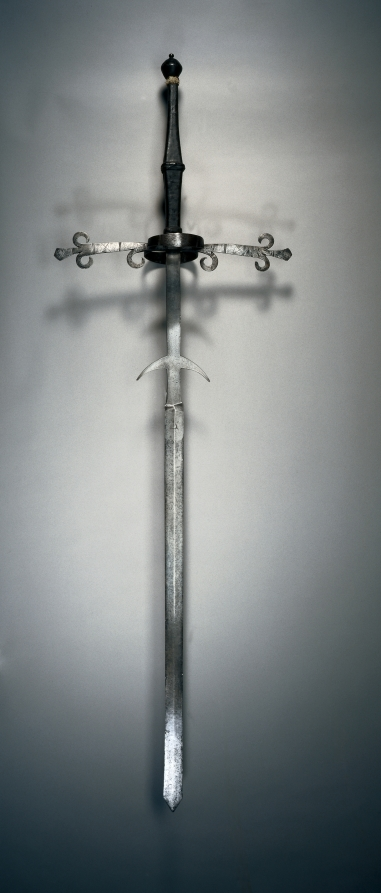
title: Two-Handed Sword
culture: Germany, second half 16th Century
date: 1550–1600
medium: steel, leather and wood grip, bronze pommel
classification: Arms and Armor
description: The two-handed sword, originally a weapon of war for specialist infantry, is so named because two hands were required to wield it. By the late 1600s, these enormous swords assumed a largely ceremonial or bodyguard function.